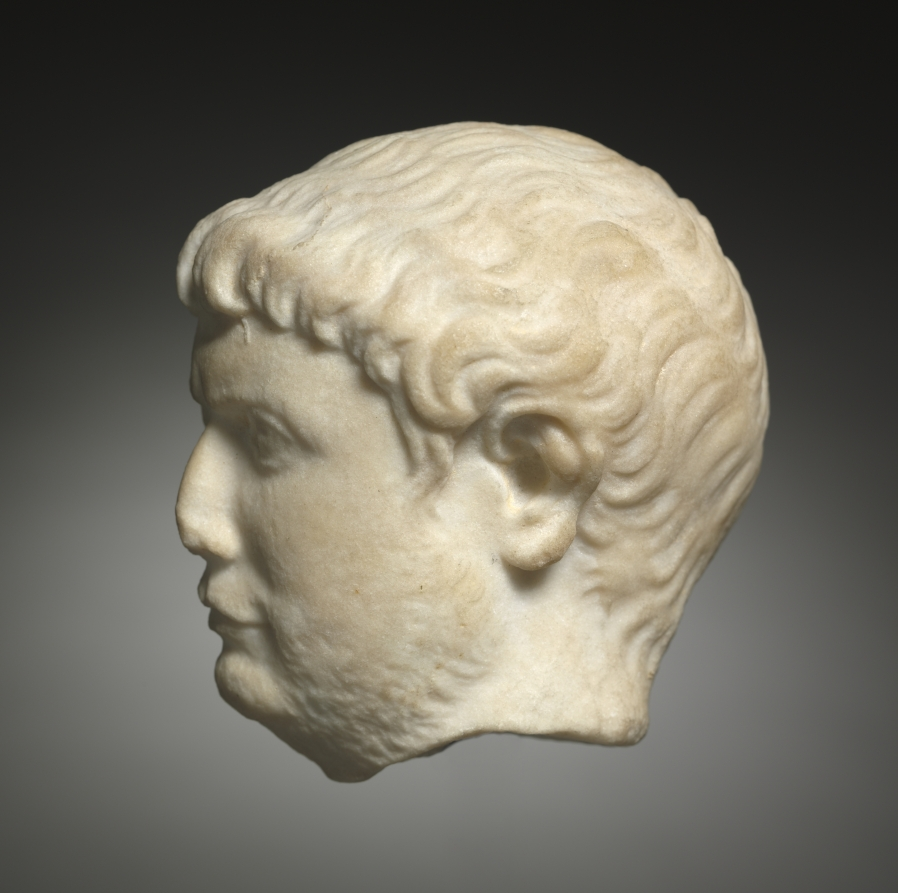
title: Head of Trajan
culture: Italy, Roman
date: 100–200 CE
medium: marble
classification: Sculpture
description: Though this portrait head has many of the features associated with the emperor Trajan, such as his short, comma-shaped forelocks, other aspects of the statue are unusual. For example, all other known portraits of Trajan depict him as clean shaven, but this one appears to have facial hair. Provincial portraits—that is, those made outside of Italy—could sometimes differ dramatically from imperial standards. This head may be an example of provincial experimentation.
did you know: Drilled pupils only began appearing on Roman portrait statues after Trajan’s death in 117 CE; their appearance here could be a later addition.